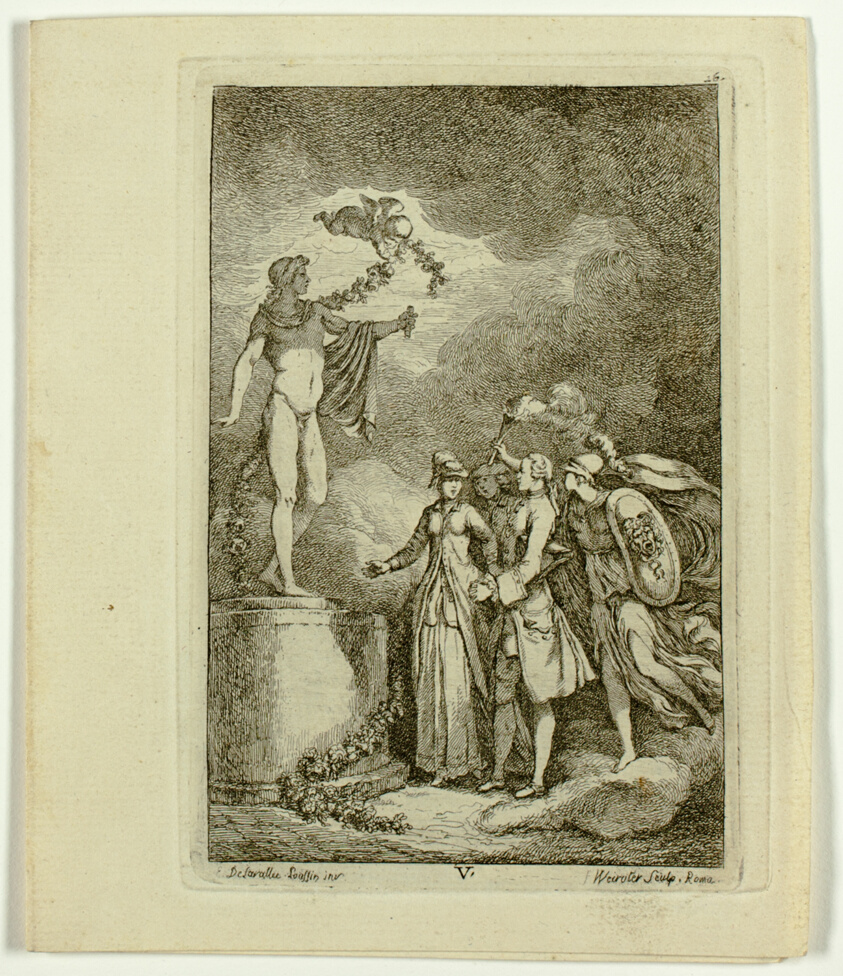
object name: Print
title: Plates 5-7, from Nella Venuta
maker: Franz Edmund Weirotter (Austrian, 1730–1771); after Etienne de Lavallée-Poussin (French, 1735–1802)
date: 1764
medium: Four etchings in black on ivory laid paper, folded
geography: France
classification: print; prints and drawing